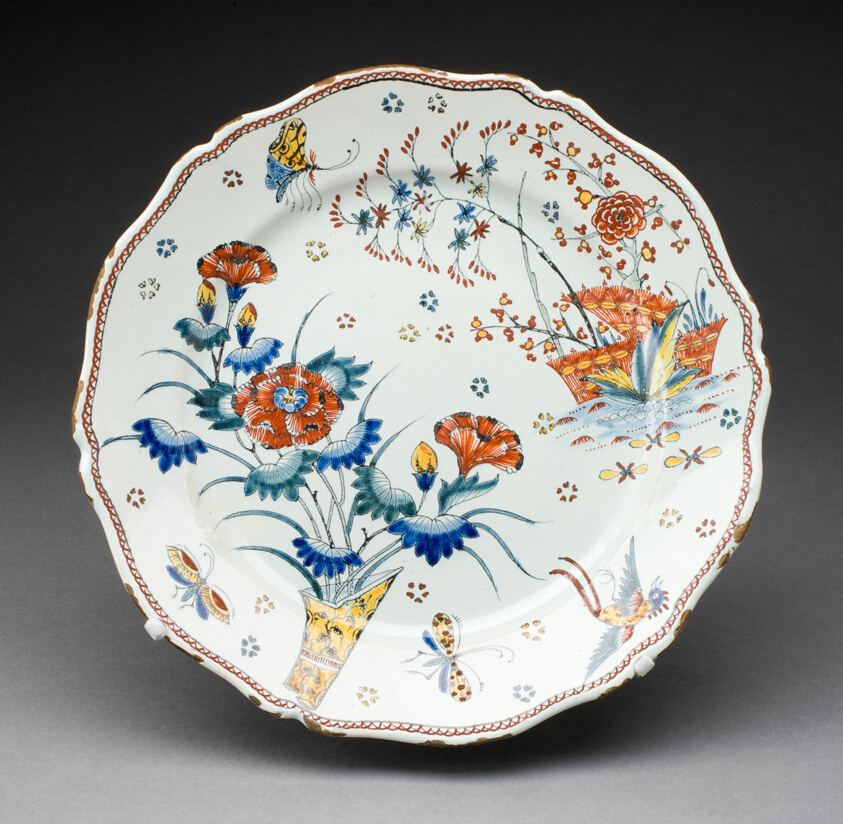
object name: Ceramics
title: Plate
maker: Rouen Potteries (French, 1526-1847)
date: c. 1730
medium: Tin-glazed earthenware (faience)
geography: Rouen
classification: plate (general, dish); dish (vessel); tin-glazed ware; earthenware; european decorative arts; ceramics